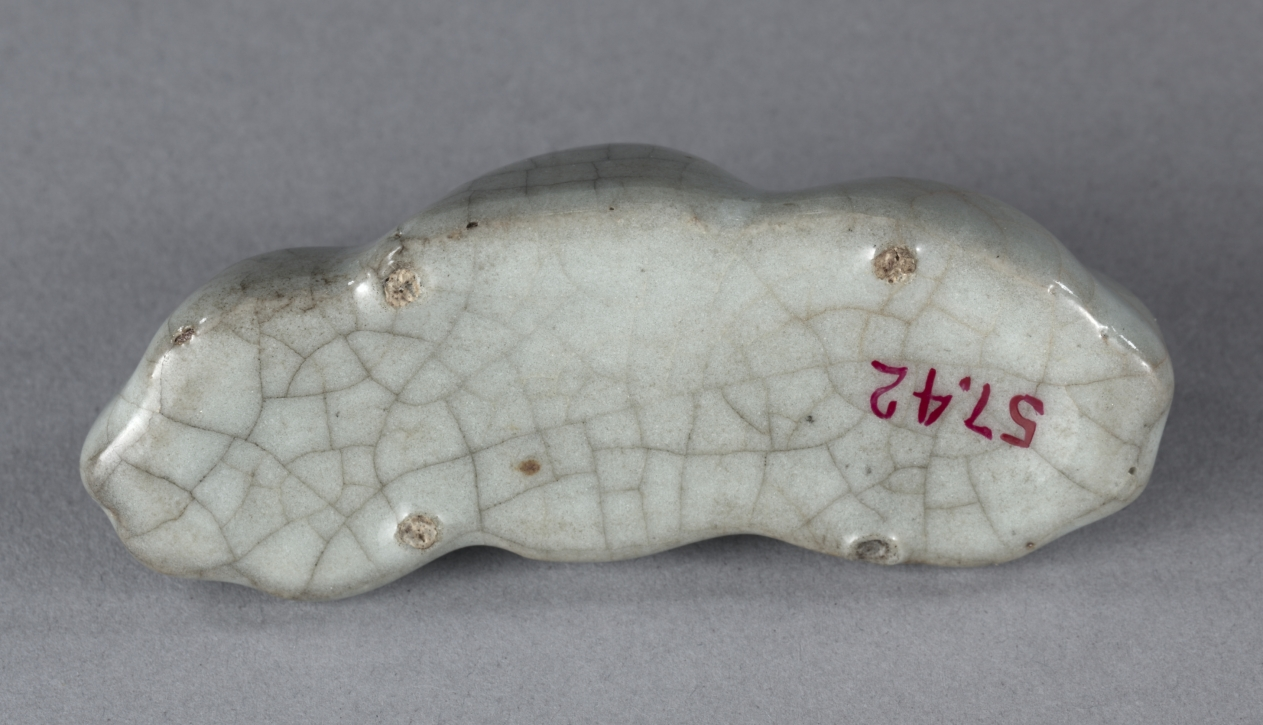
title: Brush Rest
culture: Southeast China, Zhejiang province, Southern Song dynasty (1127–1279)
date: 1127–1279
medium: glazed stoneware, Guan ware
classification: Ceramic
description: This brush rest, shaped like a mountain range, is covered with a thick and soft gray-blue crackled Guan ware glaze that pools in the deeper areas, giving the mountain range a hazy appearance as if enshrouded in white mists. Guan ware was produced in the imperial kilns in Hangzhou, the Southern Song dynasty capital.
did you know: There are twelve "hills" on this mountain-shaped brush rest.